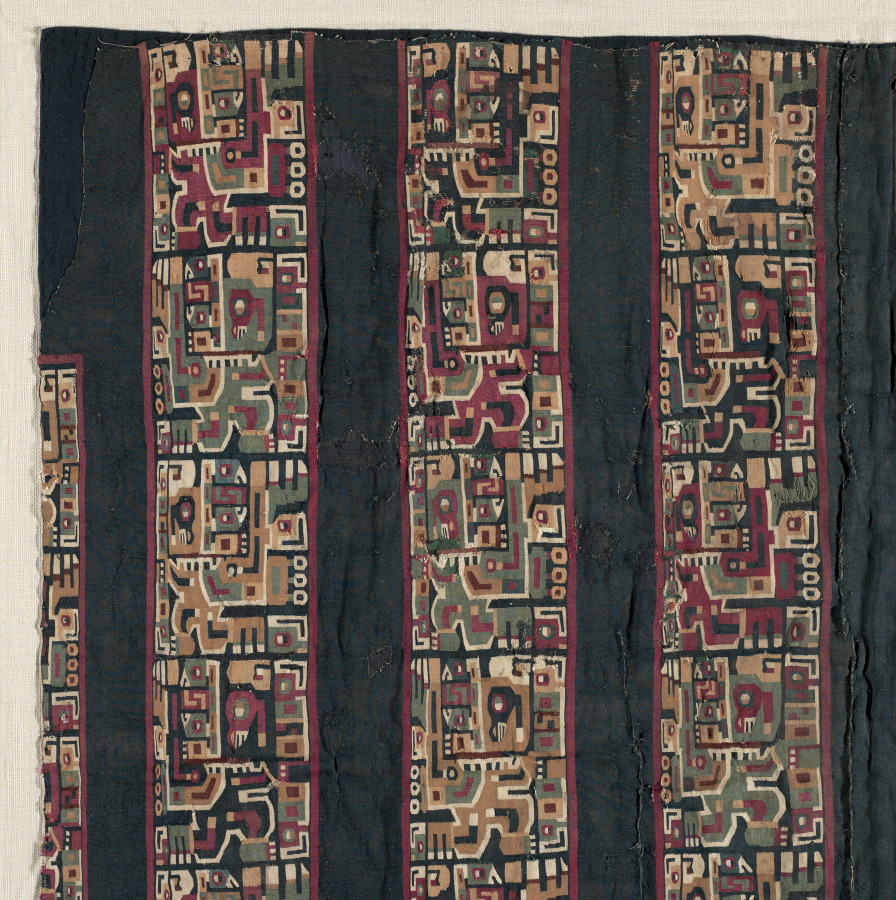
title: Half of a Sleeved Tunic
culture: Central Andes, Middle Horizon, Wari, 6th-11th century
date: c. 500–1000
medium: single-interlocked tapestry; cotton warp; camelid fiber weft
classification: Textile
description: The bird-headed creature in profile that repeats in each of this tunic's design fields gazes upward, holds a staff of authority in front of its body, and wears an ornate headdress behind which a three-feathered wing can be seen. The extremely high technical quality of such tunics suggests that the Wari reserved bird imagery for their most exalted rulers. Here, the original incorporated more than twice as much yarn as the routine--some 19 miles, all handmade and much dyed an inky, dark blue, the most prestigious of Wari colors.